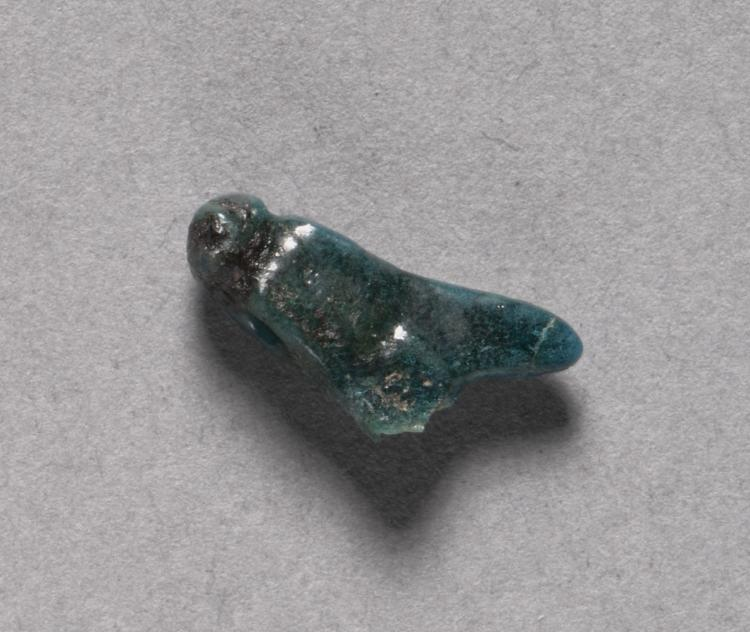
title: Fly Amulet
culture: Egypt, Middle Kingdom (2040–1648 BCE)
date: 2040–1648 BCE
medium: deep turquoise green faience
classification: Amulets